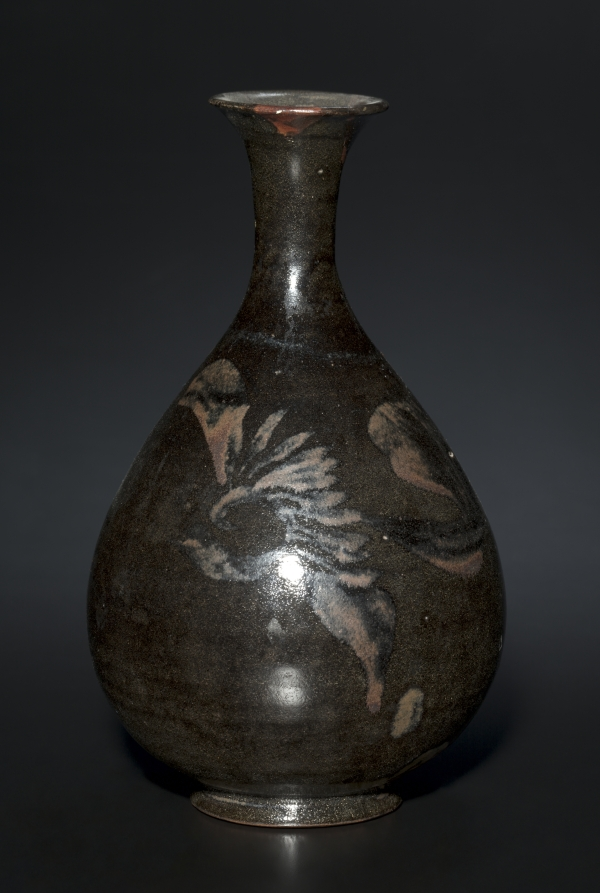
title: Bottle Vase: Black Ware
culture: Northern China, Jin dynasty (1115-1234) - Yuan dynasty (1271-1368)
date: 1200s-1300s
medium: glazed stoneware with underglaze slip coating and iron oxide decoration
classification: Ceramic